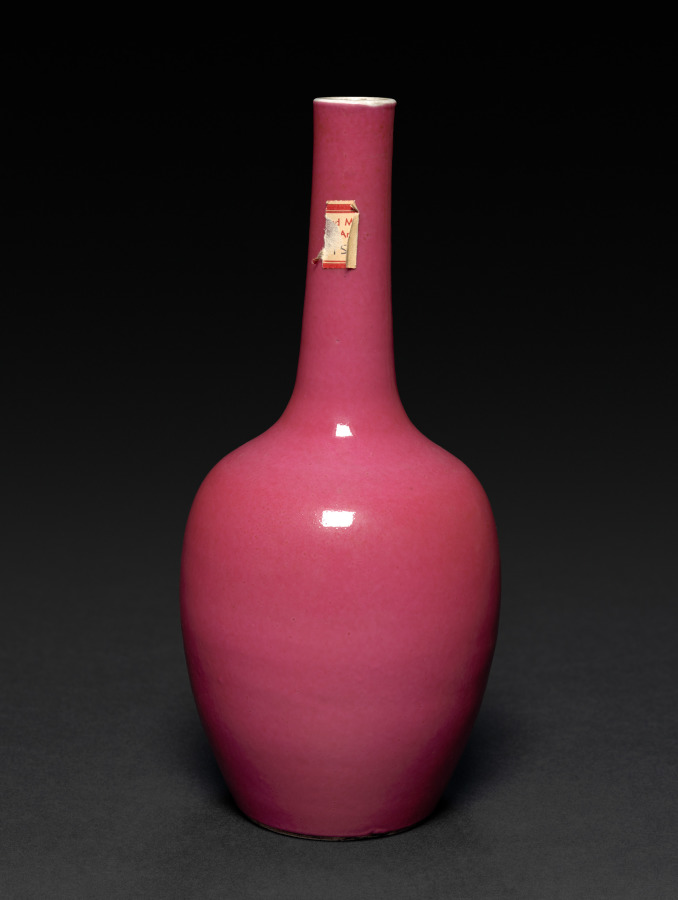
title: Vase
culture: China, Qing dynasty (1644-1911)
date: 1800s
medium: porcelain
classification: Ceramic